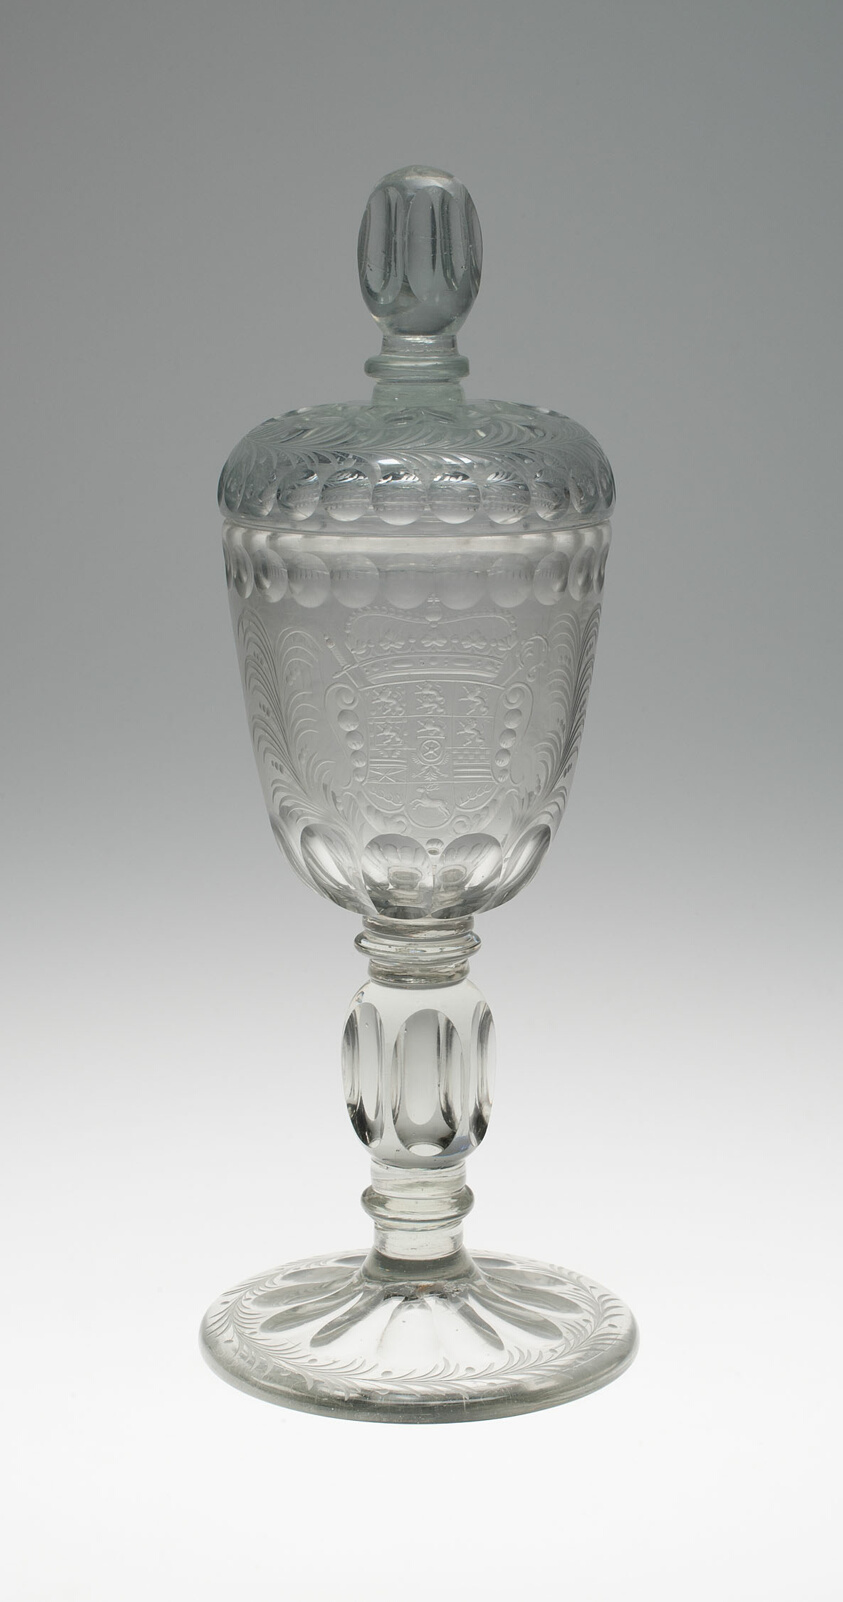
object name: Glass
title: Goblet with Cover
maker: Germany, Potsdam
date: 17th century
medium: Glass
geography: Potsdam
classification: drinking vessel; glass; european decorative arts